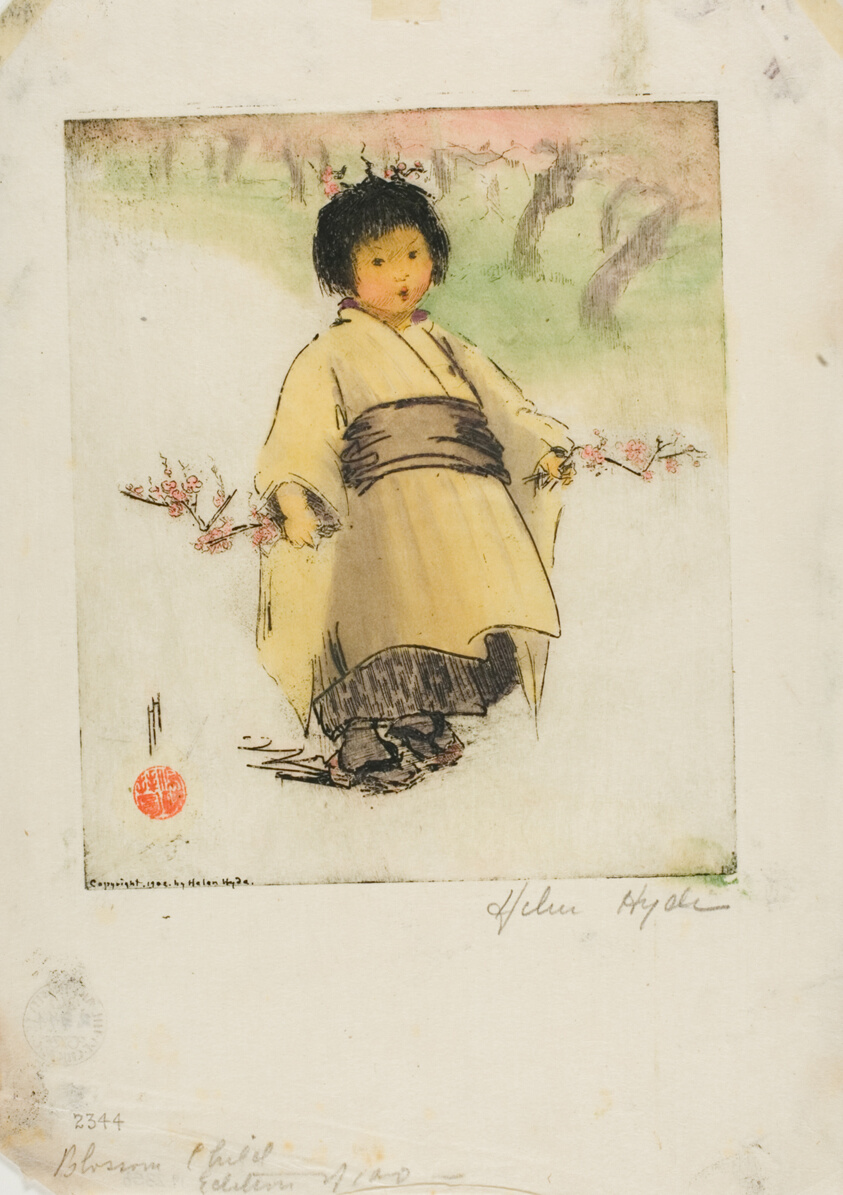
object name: Print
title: Blossom Child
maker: Helen Hyde (American, 1868-1919)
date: 1902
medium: Color etching on ivory Japanese paper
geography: United States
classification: woodcut; print; prints and drawing